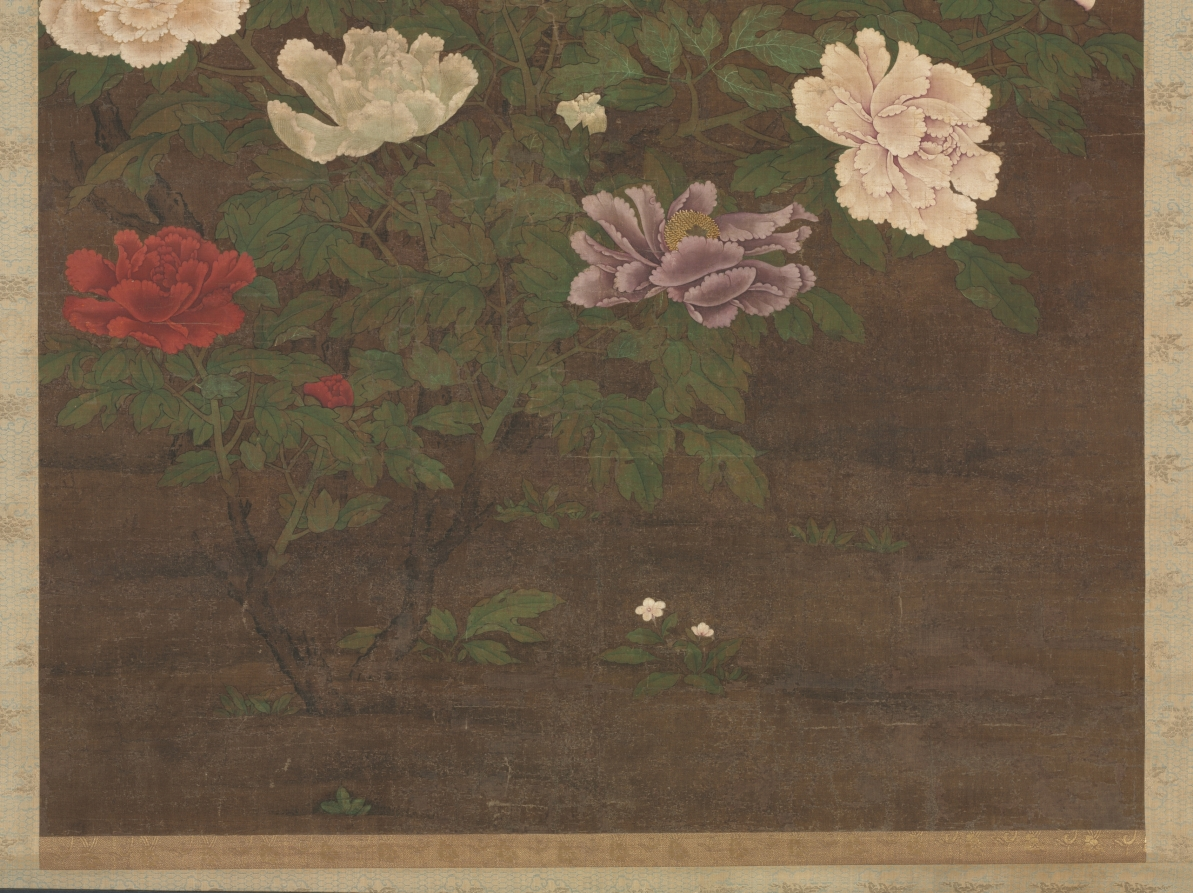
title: Peonies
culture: China, Yuan dynasty (1271-1368)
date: late 1200s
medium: hanging scroll, ink and color on silk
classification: Painting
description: In China, the peony is considered the Queen of Flowers, representing the late spring season. The shrubs of this tree peony are in full bloom, blossoming in various colors. Peony paintings were popular from the Southern Song period to the Ming dynasty. The large scale of this decorative scroll suggests that it may have been hung in a reception hall, conveying good wishes for wealth and prosperity.